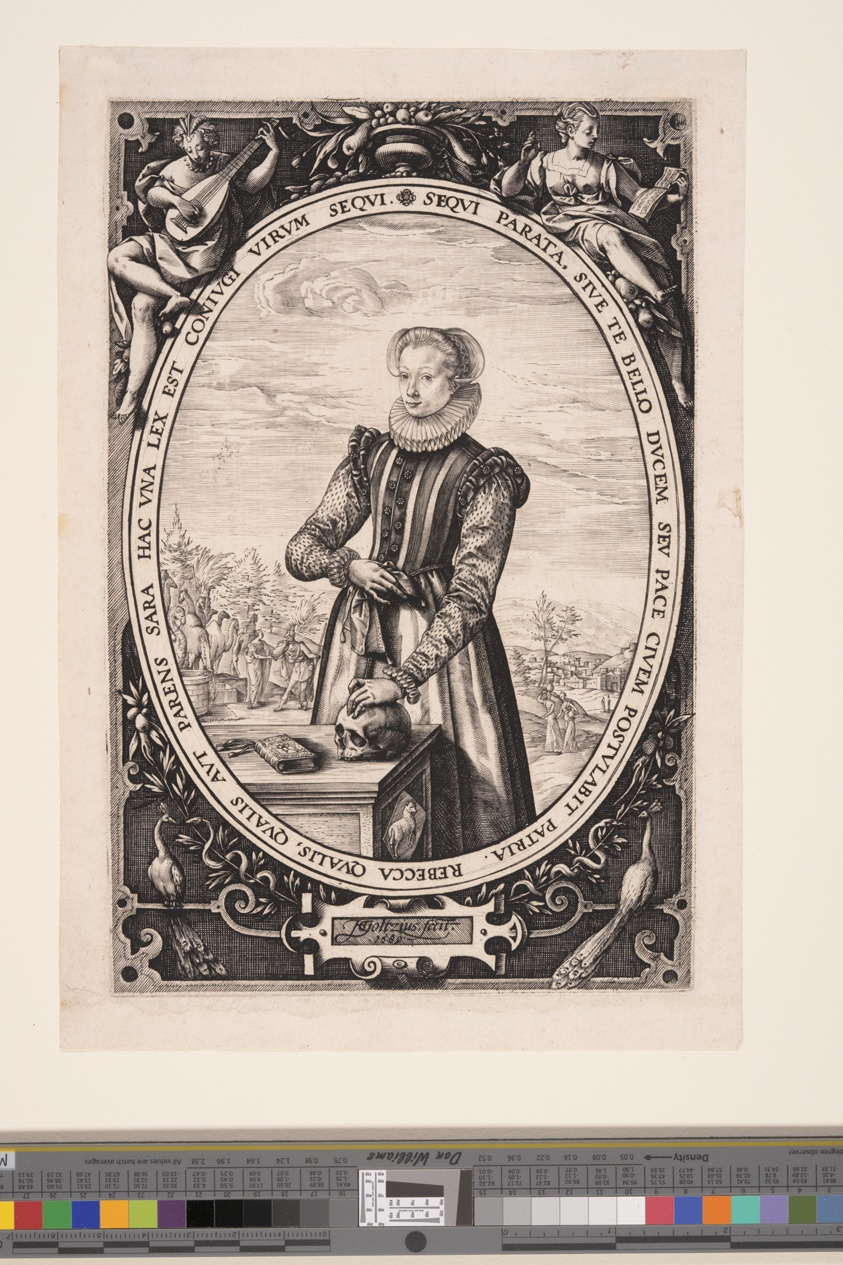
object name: Print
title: Josina Hamels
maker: Hendrick Goltzius (Dutch, 1558–1617)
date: 1580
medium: Engraving on laid paper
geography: Netherlands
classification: engraving; paper; print; prints and drawing